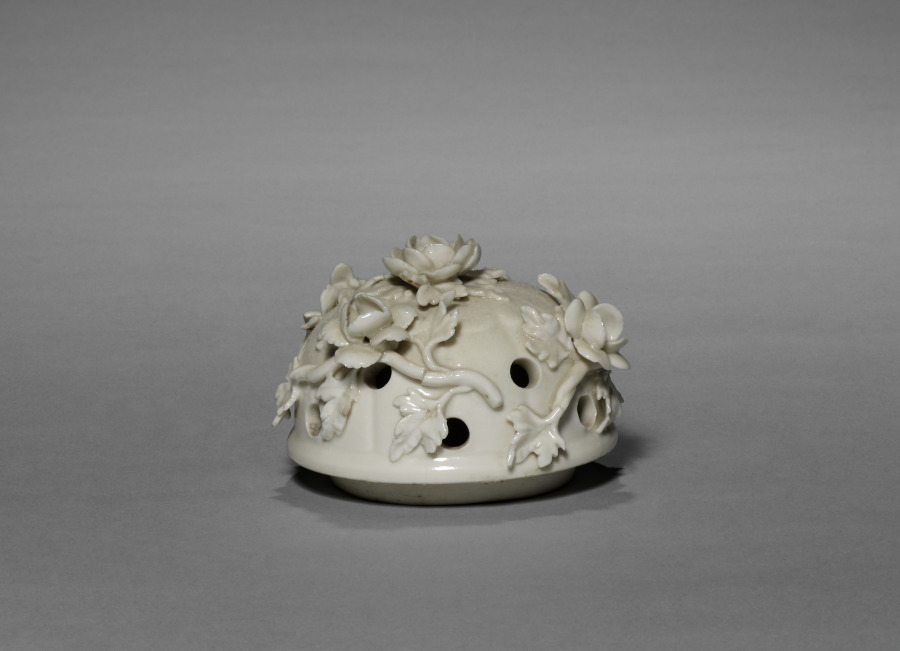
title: Potpourri Vase with Cover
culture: France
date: c. 1860–80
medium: blanc-de-chine porcelain; gilt bronze mount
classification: Ceramic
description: This vase was likely made by the celebrated Parisian ceramics firm of Edmé Samson (1810–91). To cater to the resurgence in taste for 18th-century designs, the Samson firm specialized in making reproductions of rare 18th-century European porcelains, especially those from firms that had already copied Chinese porcelains. In this case, this vase's design is taken from models produced by the Saint-Cloud factory in the 1750s after earlier Qing dynasty Chinese ceramics. However, the telltale sign that this vase is made by Samson and not Saint-Cloud is that the original would have been made from a soft-paste porcelain (fired at a lower temperature), while this example is made of hard-paste porcelain (fired at the highest temperature).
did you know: Potpourri vases always have holes in the top to let the scent of dried spices and flowers contained within freshen the air around them.